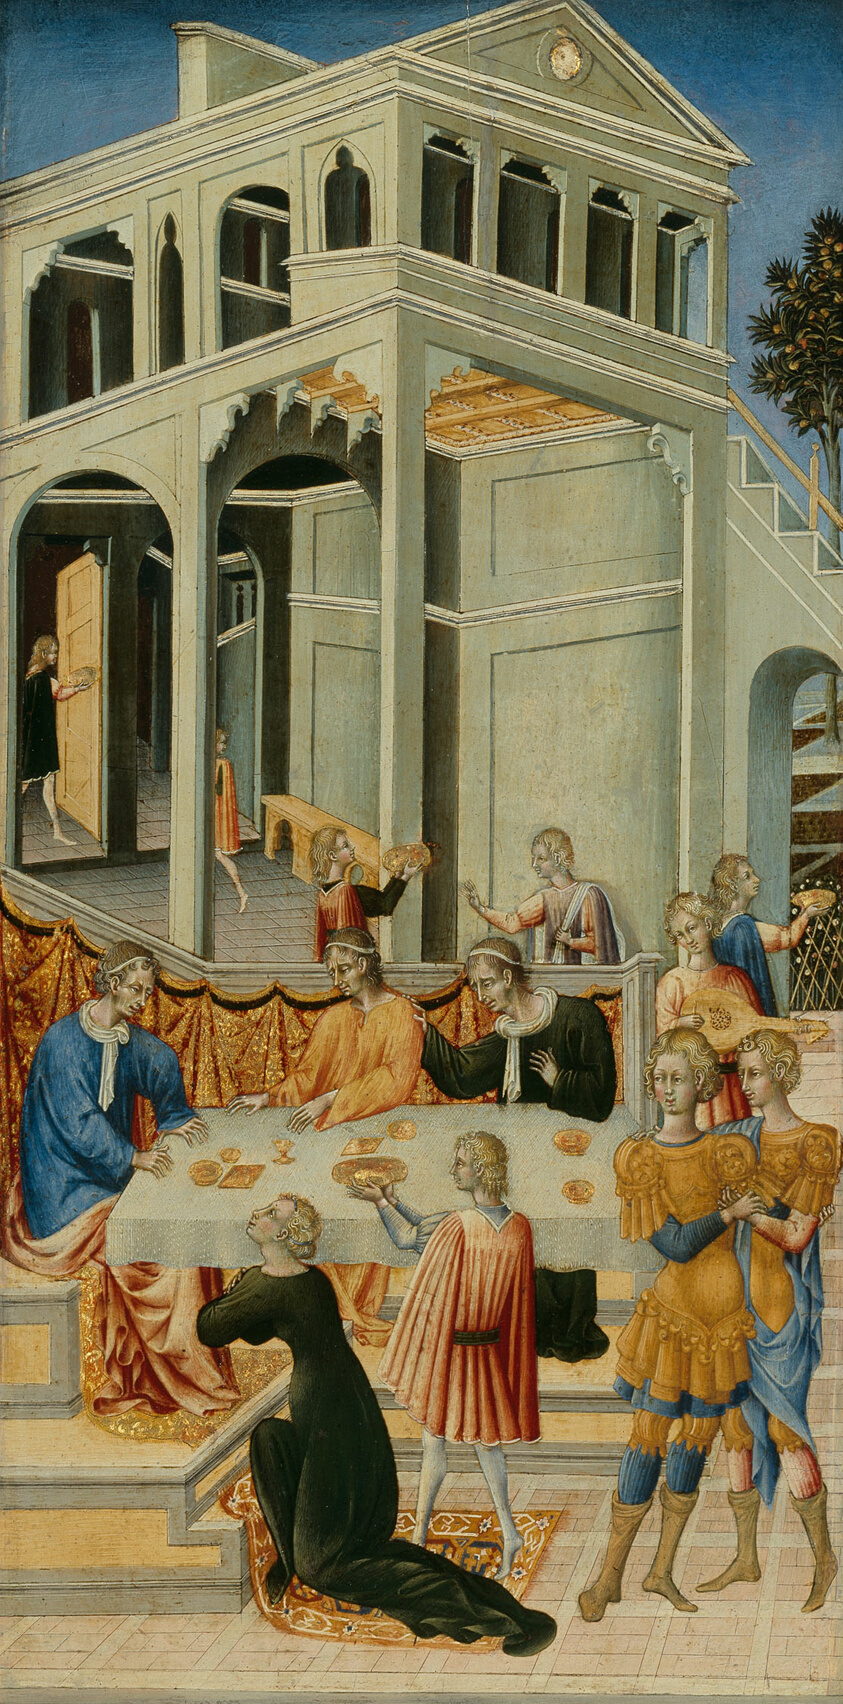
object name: Painting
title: Salome Asking Herod for the Head of Saint John the Baptist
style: Renaissance, 15th century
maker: Giovanni di Paolo (Italian, 1398–1482)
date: c. 1455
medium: Tempera on panel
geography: Italy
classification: tempera; Italian; paint; painting; european painting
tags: Saint John the Baptist, biblical, Christian subjects, Christianity, Devotion, Italy, religious, religious figures, religious scenes, saints, musical instruments, music, castles, servingware, soldiers, luxury, table, feast, wealth, nobility, men, woman, king, Salome, religion, Century of Progress, world's fairs, Chicago World's Fairs